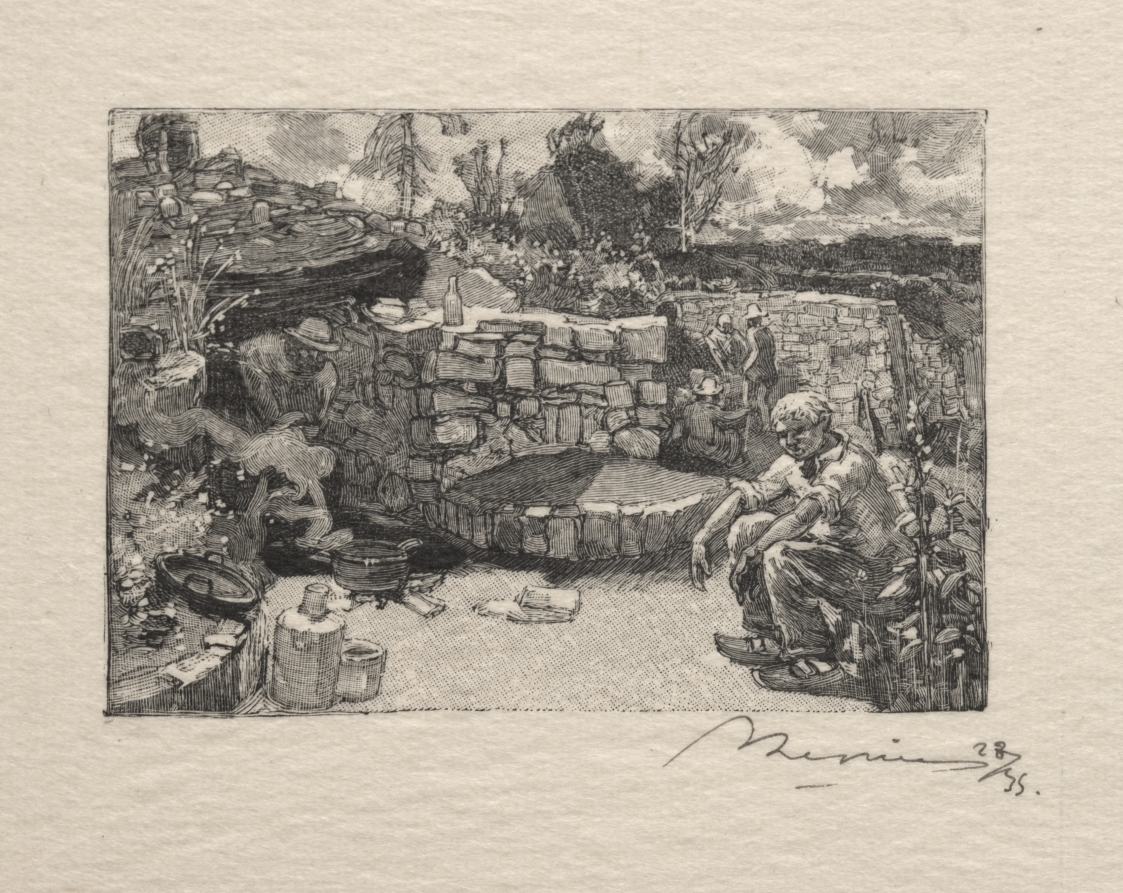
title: Une loge de carrier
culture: France, 19th-20th century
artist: Auguste Louis Lepère (French, 1849–1918)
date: c. 1870–1918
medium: wood engraving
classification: Print